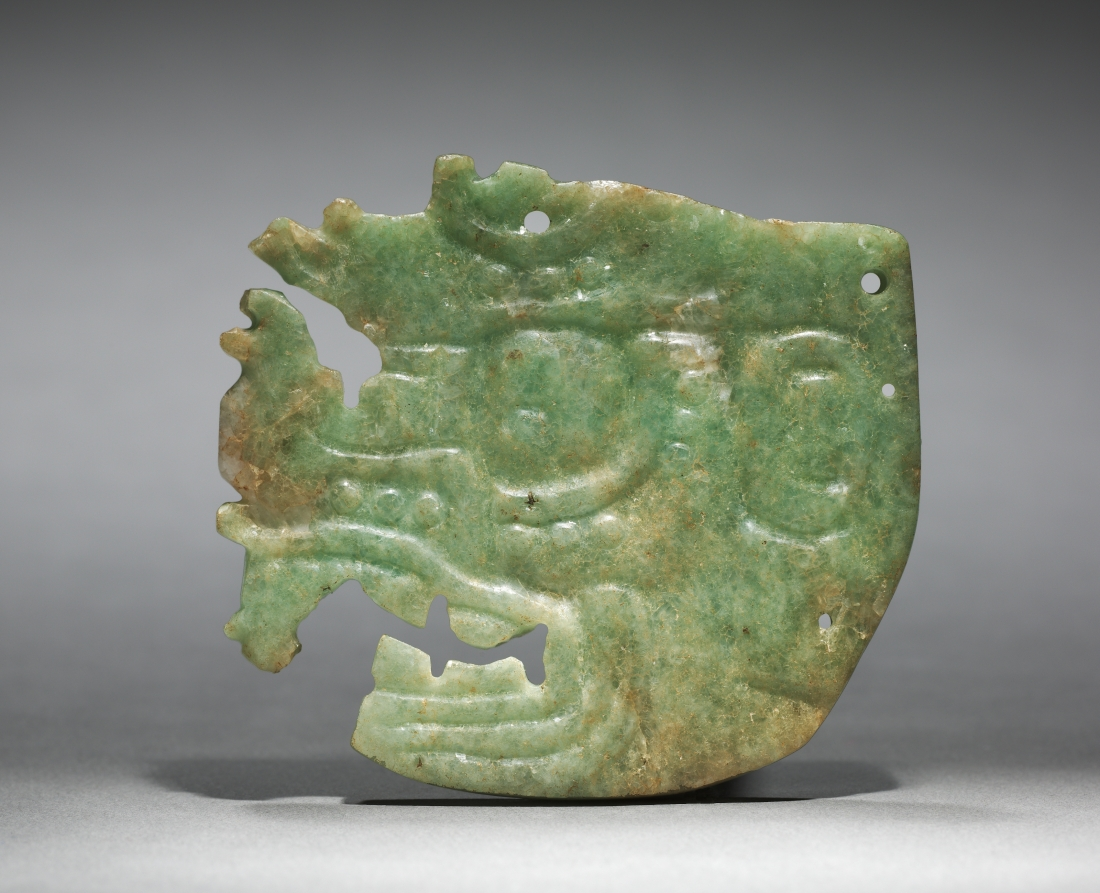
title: Crown Ornament (Hu’unal)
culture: Mexico or Central America, Maya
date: 250–900 CE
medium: jadeite-albitite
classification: Jade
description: This plaque, which represents the head of a deity affiliated with Maya royalty, served as a ruler’s crown ornament (hu’unal). It was attached to the crown via the holes along the back edge in such a way that the identical carvings on both sides were visible. The ornament is now broken along the upper edge.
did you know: This plaque represents the head of a deity affiliated with Maya royalty.